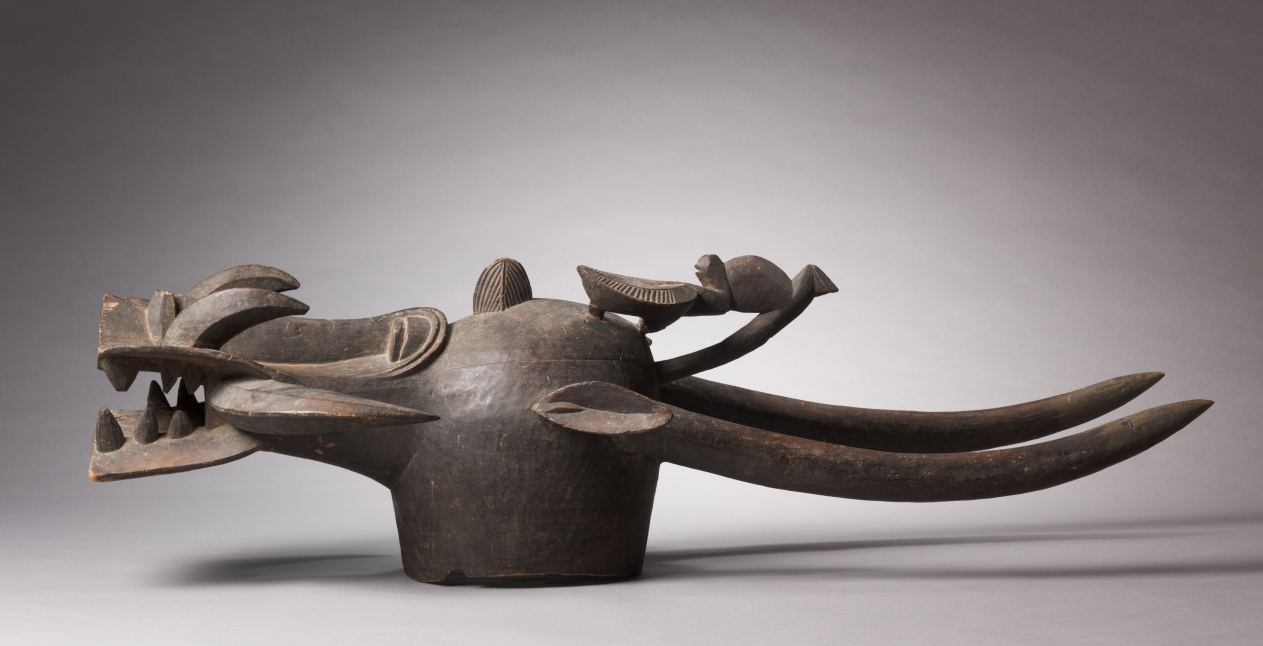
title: Helmet Mask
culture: Western Sudan, Ivory Coast, Senufo, 20th century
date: early to mid-1900s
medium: wood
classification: Mask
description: The iconography of this helmet mask is comprised of sculpted renderings of different animal attributes including a ram's horns, a warthog's tusks, a crocodile's mouth, and a hyena's snout. Carved between the long antelope horns is a miniature chameleon that holds an abstract wing-shaped motif called mangele. Intended to impress and terrify, the sculpture's fearsome aesthetic alludes to the mask's power as an anti-sorcery device.